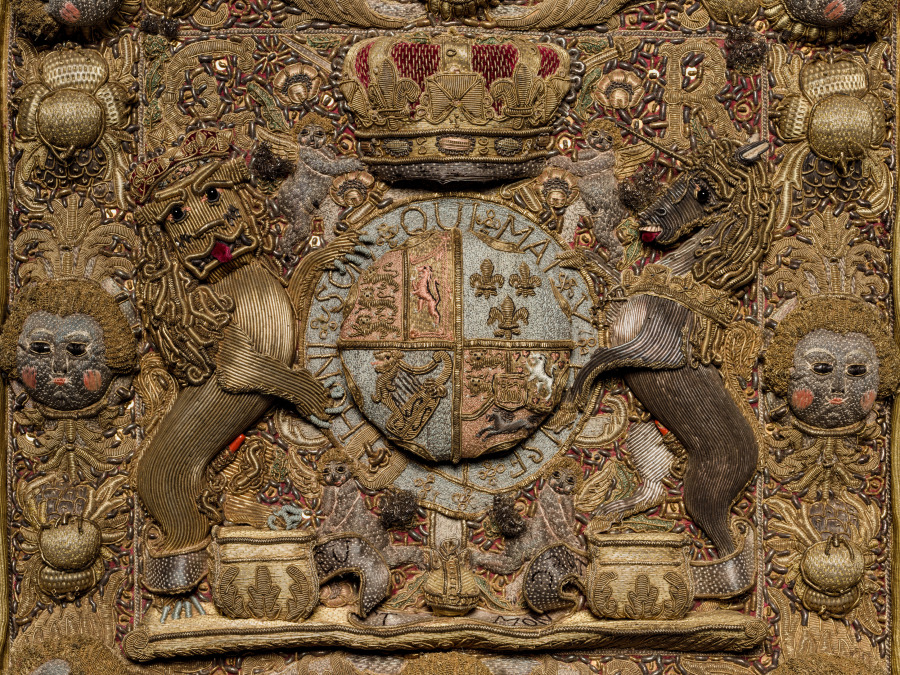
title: Lord Chancellor's Burse (Purse) with Royal Cypher and Coat of Arms of George III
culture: England, 18th century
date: 1700s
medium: red silk velvet, silk embroidery, goldwork, pearls, black beads, sequins, pendant tassels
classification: Velvet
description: A richly decorated burse (purse) to hold the monarch's Great Seal of the Realm has a traditional role in the opening of parliament. The safekeeping of the seal was the responsibility of the Keeper of the Great Seal, an office later incorporated into the role of Lord Chancellor. Because the Great Seal was attached to all major documents of state, it was the ultimate symbol of royal authority. The use of a special burse to hold the seal can be traced back to the end of the 13th century. By the end of the 16th century, the burse had evolved into the highly decorated, professional work of embroidery seen in this object. It includes the lion and unicorn surrounding the royal crest and is made from crimson velvet. Burses were replaced annually; it being a "perk" of office that the Lord Chancellor and Keeper of the Great Seal was allowed to keep the fragments of the old seal and accompanying burse. Portraits of Lord Chancellors, from the Tudor period onward, depict them with their burse. Cleveland’s collection includes one such portrait by American artist Gilbert Stuart (1755–1828) of Irish Lord Chancellor John FitzGibbon, 1st Earl of Clare (1748–1802) who was Lord Chancellor from 1789 to 1802. Baron FitzGibbon’s portrait (1919.910) is on view in gallery 204.